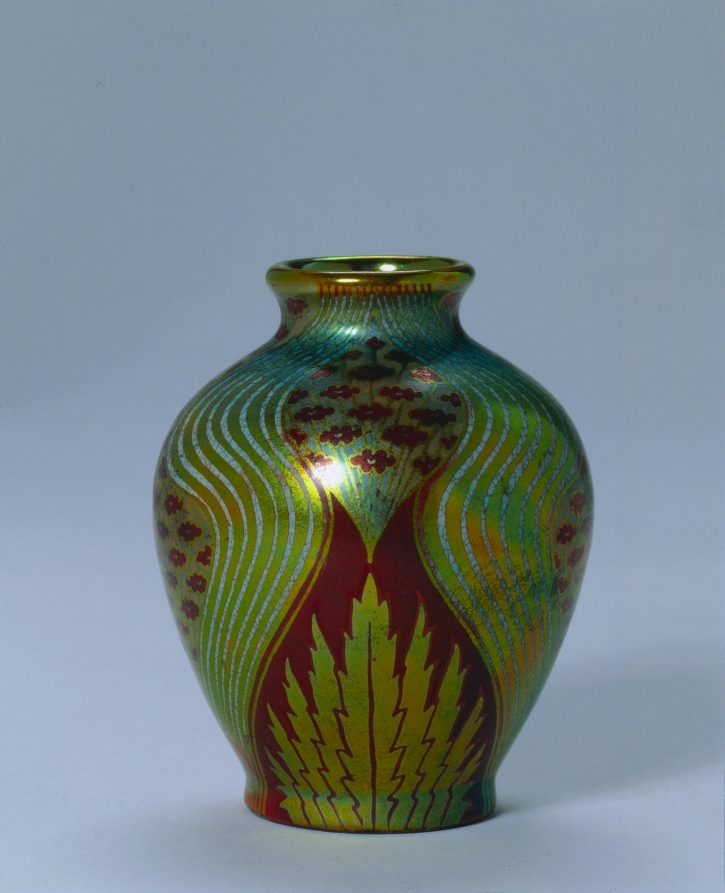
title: Miniature Vase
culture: Hungary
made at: Zsolnay Factory (Hungarian)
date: c. 1900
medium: pottery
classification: Ceramic